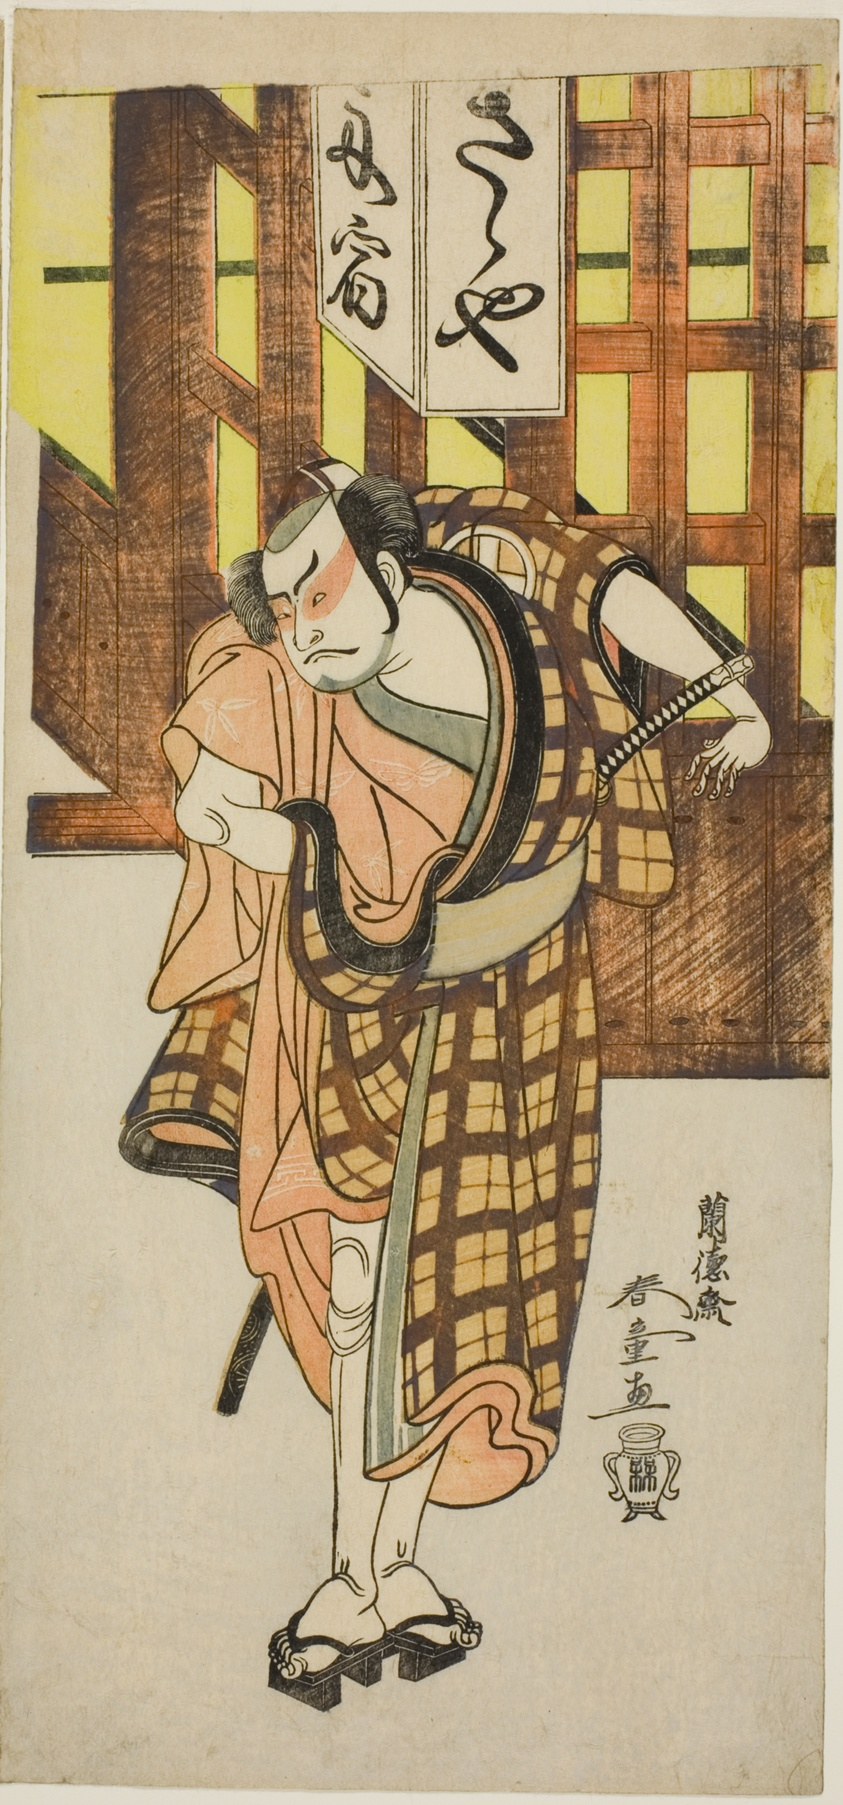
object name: Print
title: Actors Nakamura Sukegorô II as Sasano Sangobei (Left) and Ôtani Hiroji III as Satsuma Gengobei (Right) in “Green Willow Soga of Erotic Design” (“Iro moyô aoyagi Soga”)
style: Japanese (culture or style)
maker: Rantokusai Shundô (Japanese, active about 1770–90)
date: About 1775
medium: Color woodblock prints; hosoban diptych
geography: Japan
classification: woodblock print; print; asian art